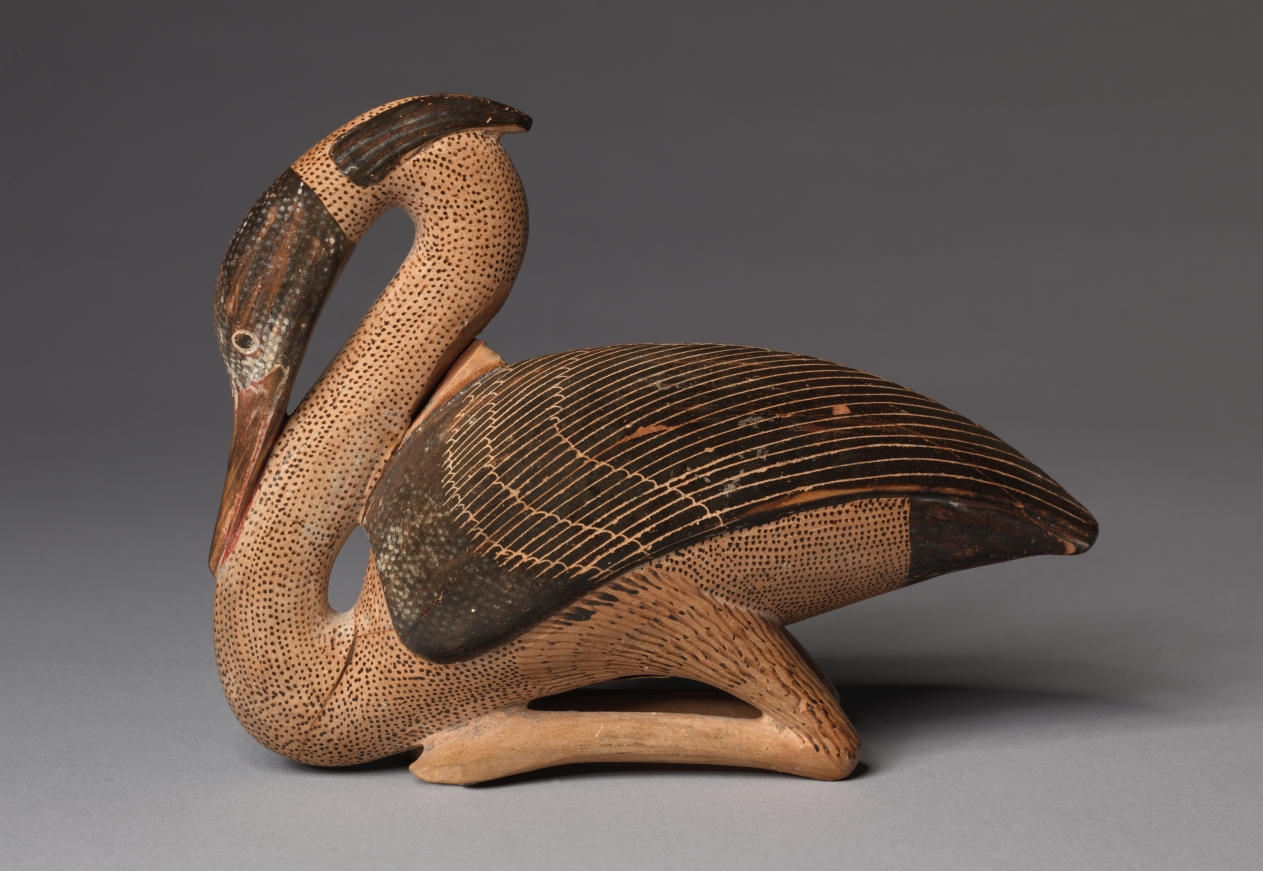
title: Heron-Shaped Figure Vase (Oil Vessel)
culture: East Greek, probably Milesian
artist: assigned to Robertson's Group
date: c. 580 BCE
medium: ceramic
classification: Ceramic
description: In the 6th century BC, a particular type of vessel for scented oil was produced in Corinth, Rhodes, and along the western coast of Asia Minor. Primarily animal forms, they are made of unglazed fired clay with painted decoration. This example in the form of a heron was crafted by a Milesian potter. The bird rests with its delicately curving and counter-curving neck nearly touching the ground; the feathers are defined by incision and painted black slip.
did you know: An aryballos is a vessel that contained scented oils, this one in the shape of a heron.